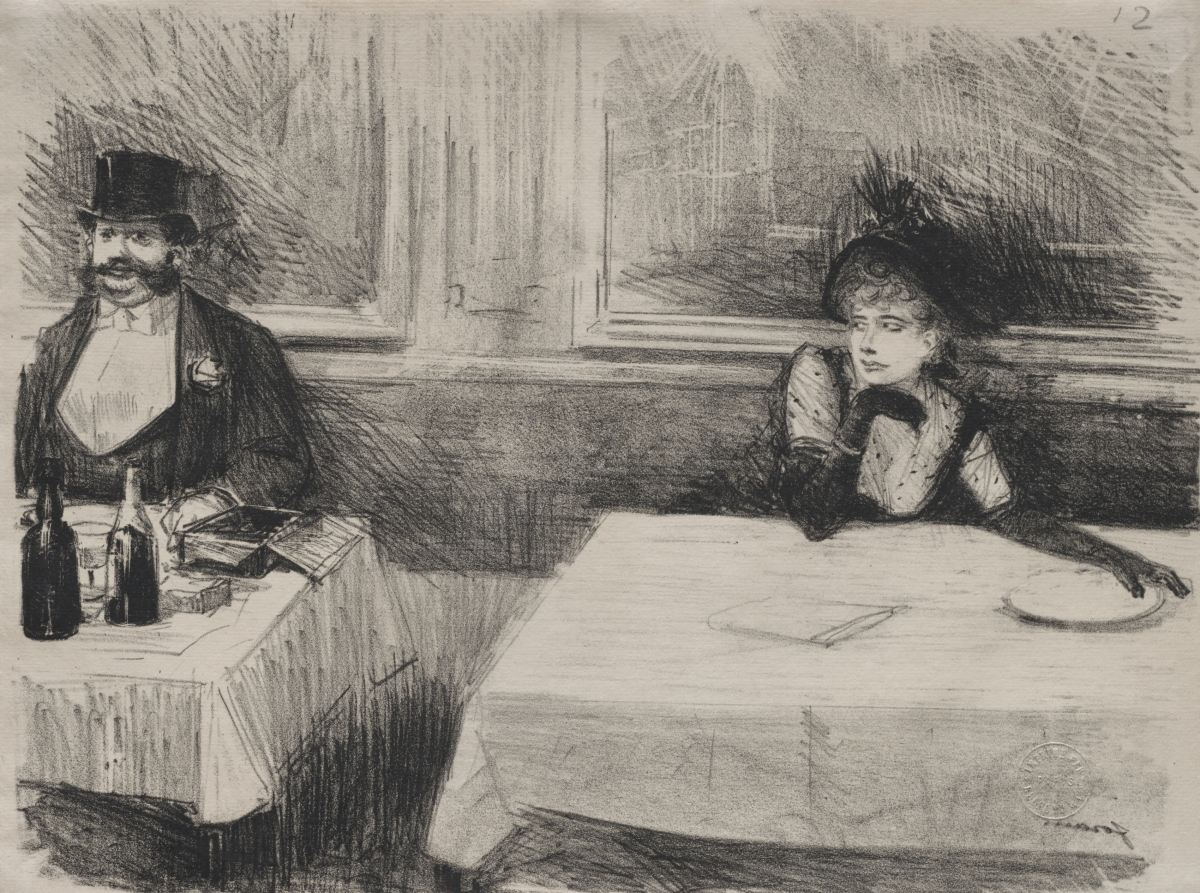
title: At the Restaurant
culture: France, 19th century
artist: Jean Louis Forain (French, 1852–1931)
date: c. 1890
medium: lithograph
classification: Print